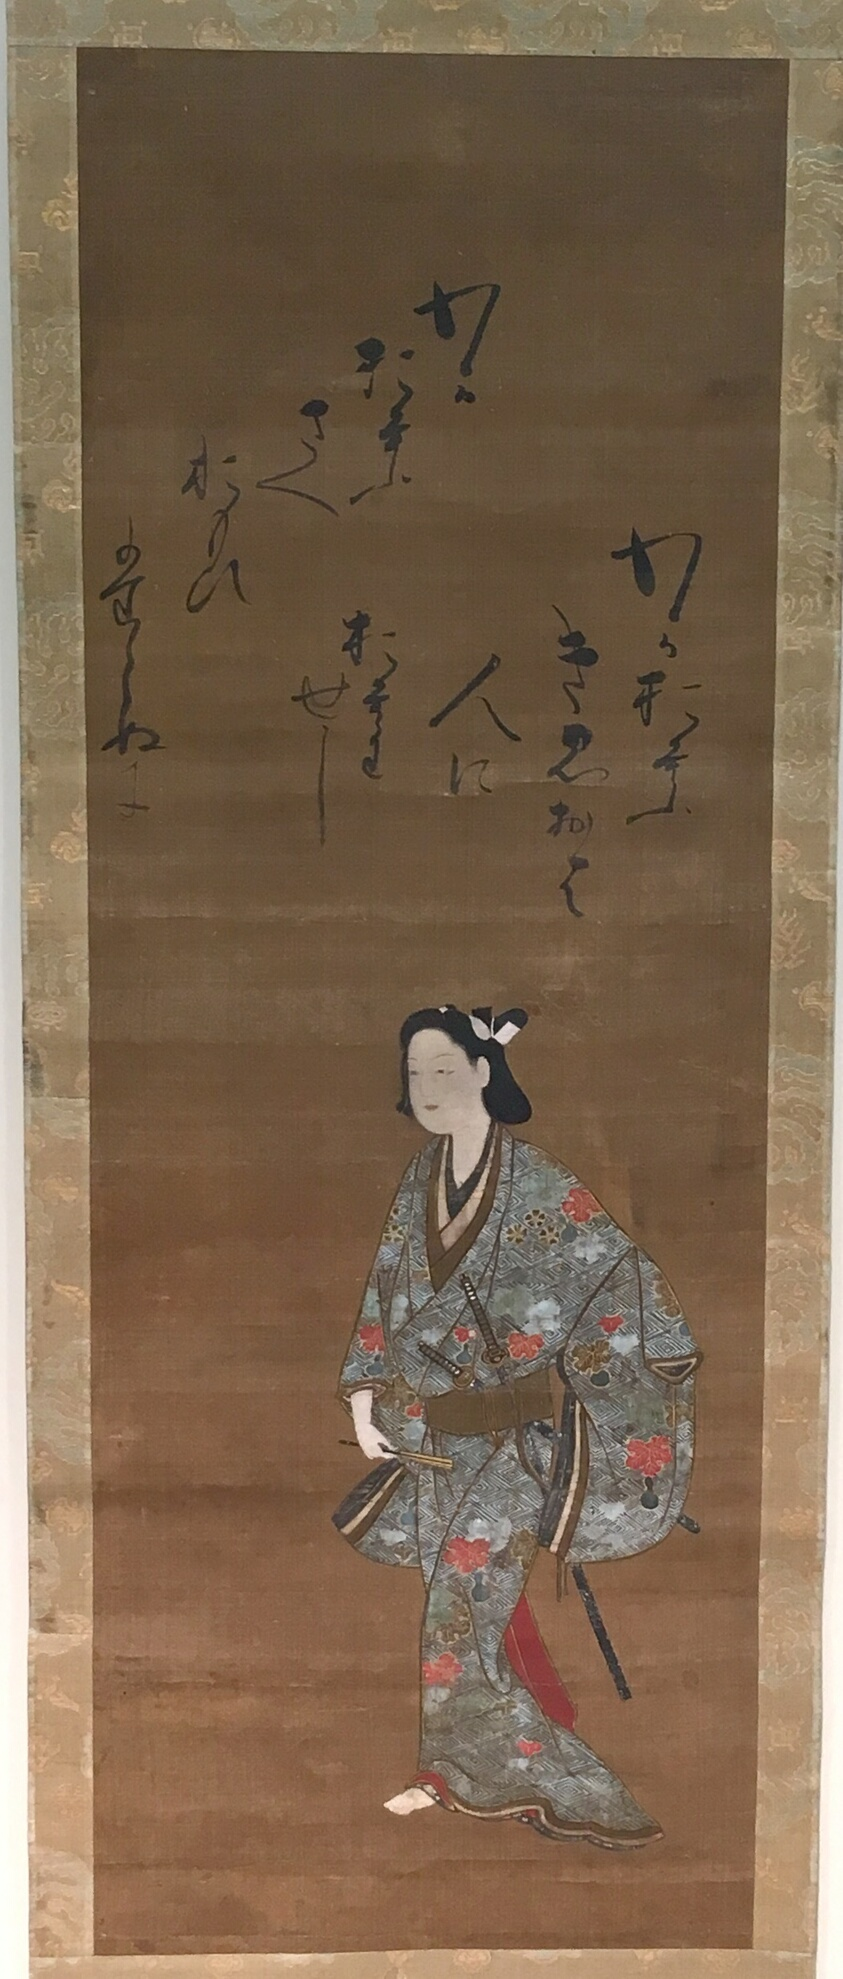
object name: Painting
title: Samurai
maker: Iwasa Matabei; Japanese, 1578-1650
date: 17th century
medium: Hanging scroll; ink and color on paper.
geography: Japan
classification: hanging scroll; painting; asian art